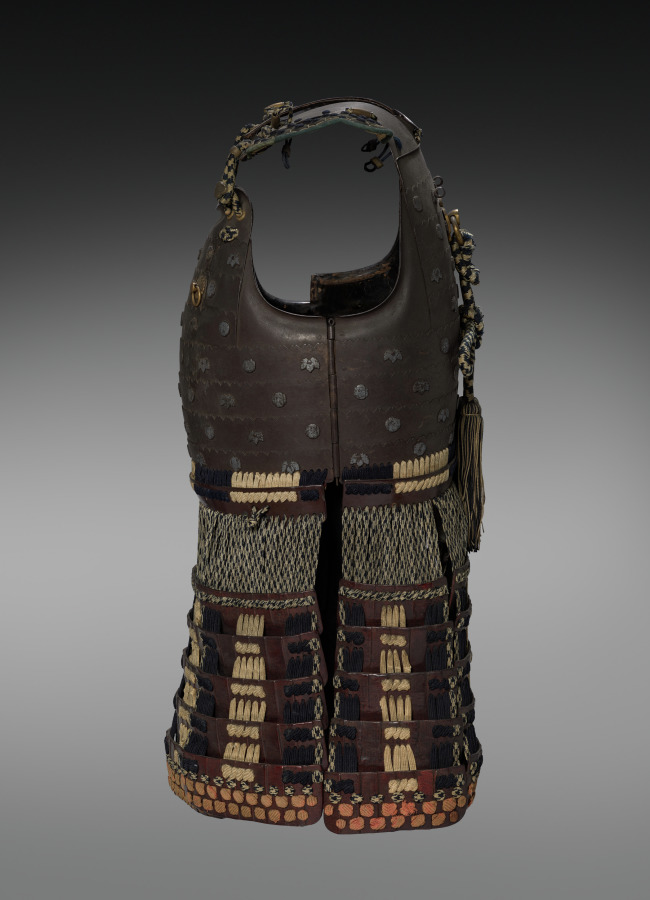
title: Chest Armor (Cuirass; Dō) and Fauld (Kusazuri)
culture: Japan, Edo period (1615–1868)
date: 1600s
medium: Iron, lacquer, textile (silk)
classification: Arms and Armor